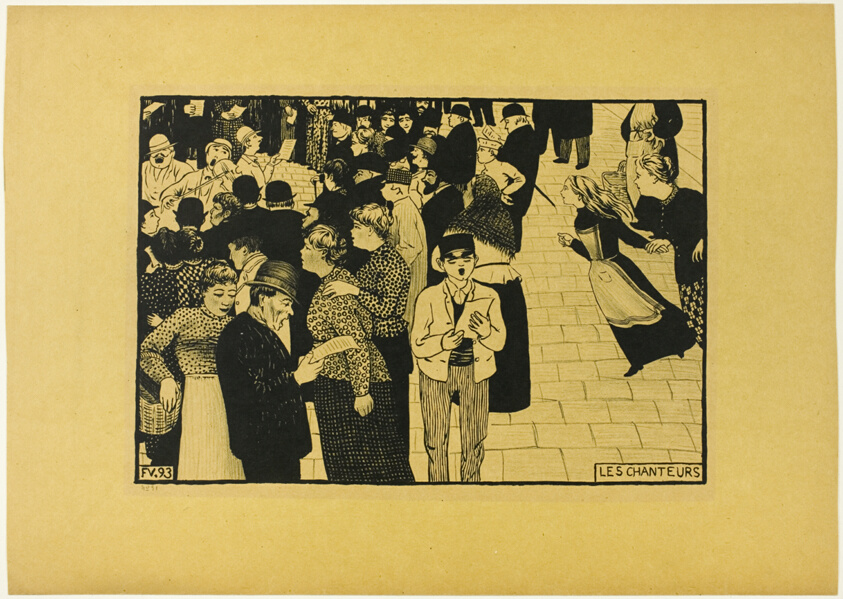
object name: Print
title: The Singers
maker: Félix Edouard Vallotton (French, born Switzerland, 1865-1925)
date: 1893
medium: Zincograph in black on dark yellow wove paper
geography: France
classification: zincograph; lithograph; print; prints and drawing